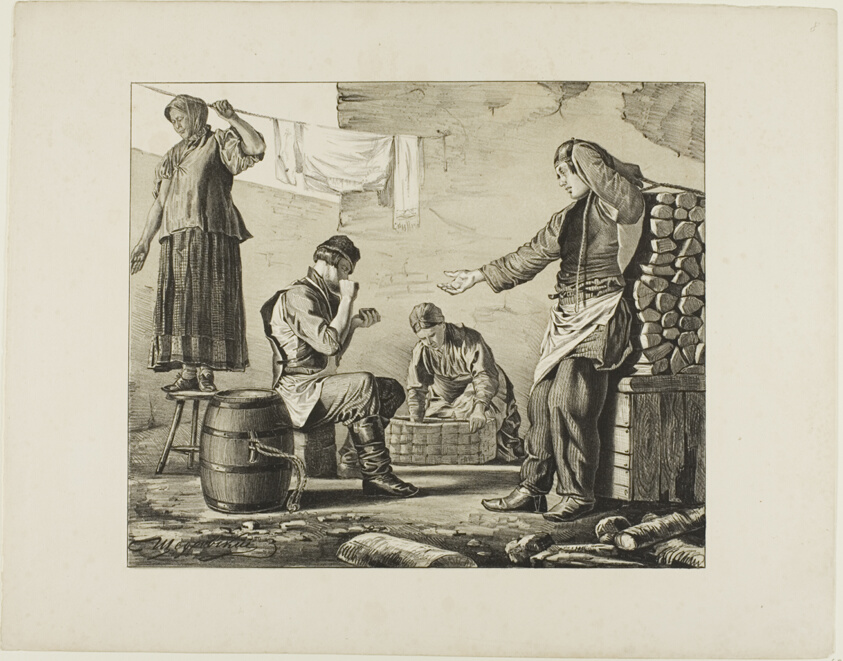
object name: Print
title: Scenes from Russian Folk Life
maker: Ignatii Stepanovich Shchedrovskii (Russian, 1815-1870)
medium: Color lithograph on paper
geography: Russia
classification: lithograph; print; prints and drawing